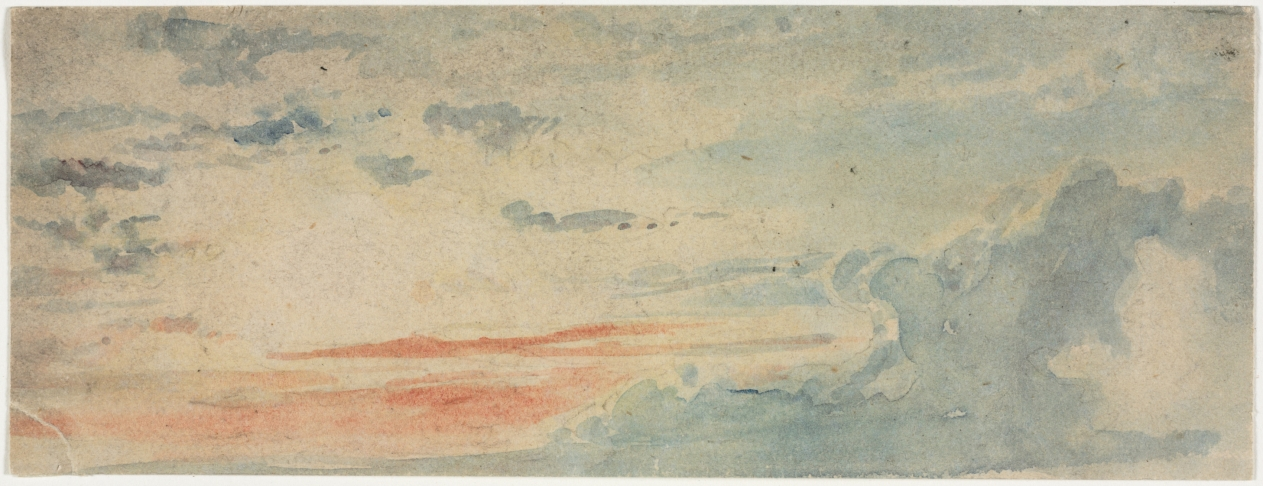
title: Cloud Study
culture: England, 19th century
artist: Anonymous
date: 1800s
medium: watercolor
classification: Drawing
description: Many English watercolorists of the period were especially interested in capturing natural effects of the landscape, such as cloud formations. Such studies were of particular interest to the French Impressionists.